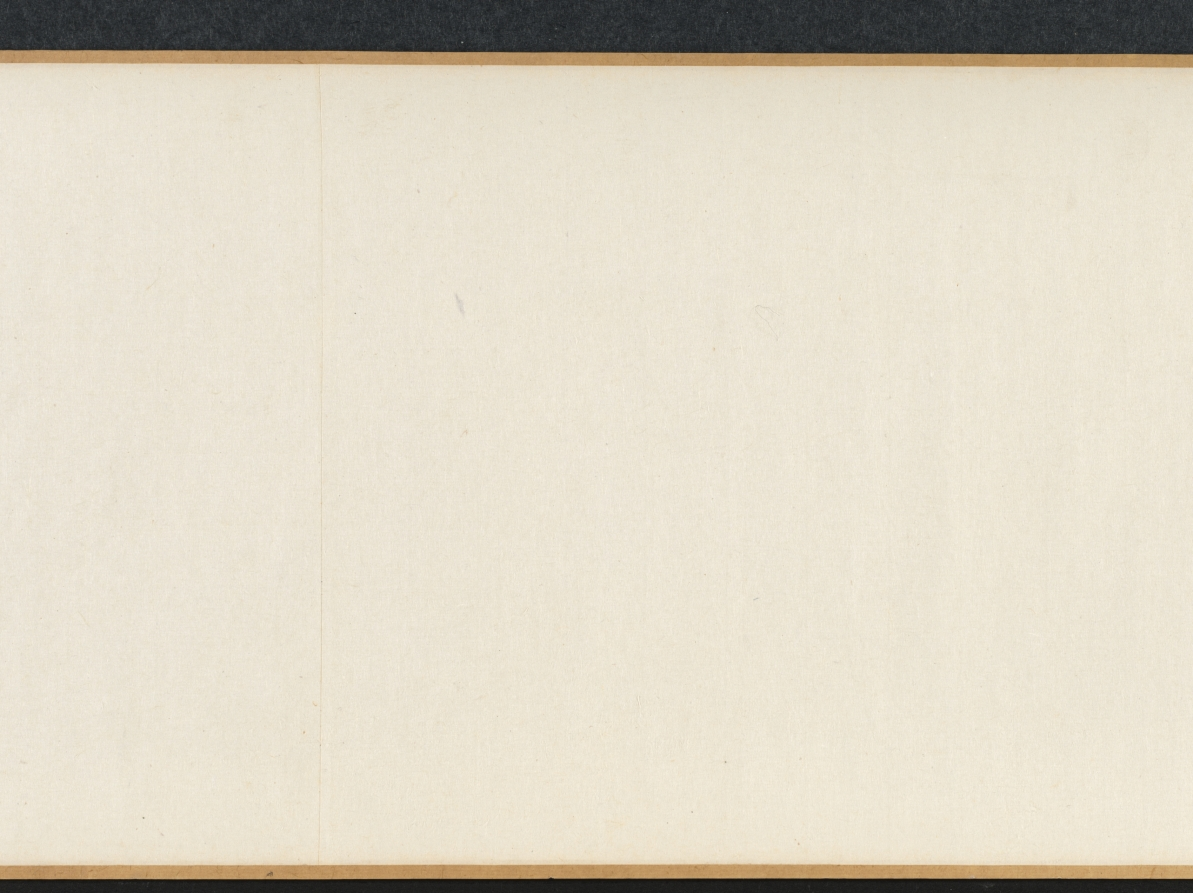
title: Zhao Mengfu Writing the Heart (Hridaya) Sutra in Exchange for Tea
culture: China, Ming dynasty (1368–1644)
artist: Qiu Ying (Chinese, 1494–1552)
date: 1542–43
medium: handscroll, ink and light color on paper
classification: Painting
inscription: Inscription accompanying text of "Heart" sutra, by Wen Zhengming 文徵明 (1470-1559): Zhengming 徵明, written in a boat at Kunshan 崑山, on the twenty-first day of the ninth month, in the renyin 壬寅 year, the twenty-first year of the Jiajing era [1542].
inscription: Colophon by Wang Shih-mou: Chou Yü-shün [Feng-lai] of K'un-shan was a scholarly, refined connoisseur of antiquities. He had acquired the poem written by Chao Ch'eng-chih [Chao Meng-fu] about the exchage of tea for Chao's calligraphy of the Prajna sutra. But the sutra itself, also written by Chao Meng-fu, is lost. He therefore asked Ch'iu Shih-fu [Ch'iu Ying] to do a painting and had Wen Cheng-ming, the artist-in-attendance, write the Hridaya Sutra in the "small, regular" style for replacement. Both works are so excellent that even Chao Meng-fu himself would certainly applaud if he should be reborn to see them. I, Shih-mou, had gotten possession of this scroll from the family of Chou Yü-shün, and since it was so wonderfully matched with one of the treasures in my collection. the Hridaya Sutra written by Chao Meng-fu for Priest Li in "running script," like the reuniting of two halves of a jade pi, I completed the scroll with the several colophons written for the "tea-exchange" poem. I did this because the painting of Ch'iu Ying and the calligraphy of Wen Cheng-ming are definitely masterpieces by themselves with absolutely no need to depend on any of the colophons written for the Chao Meng-fu poem. Furthermore, the two sons of Wen Cheng-ming, Shou-ch'eng [Wen P'eng] and Hsiu-ch'eng [Wen Chia]. have each written a colophon explaining the reason for replacing the calligraphy. As their writings are both acceptable for high standard, I didn't want to throw them away. [So by separating these into two scrolls] I was able to get two complete works of art in one clever stroke. I was quite pleased with myself, and hope that those who see this scroll shall not get suspicious because of the missing colophons. Wang Shih-mou wrote in his Jih-sun-chai study, on the first day of the tenth month, in the chia-shen year of the Wan-li era [1584].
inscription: Colophon by Wen P'eng: I-shao [Wang Hsi-chi] wrote in exchange for a flock of geese. Su Tung-po wrote in exchange for meat. Both episodes have become legends of a thousand years. Sung-hsüeh [Chao Meng-fu] "teased" Priest Kung for tea, and the story was immediately immortalized in the poems by all the famous scholars of the times. Indeed, how could one say his humor and elegance are not equal to the ancient worthies? Unfortunately, the poetry has survived but the writing of the sutra is lost. Yü-shün [Chou Feng-lai] therefore asked my father to make up the writing and so here is the complete work of art. Respectfully inscribed by Wen P'eng in the mid-summer of 1543.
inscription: Colophon by Wen Chia: Sung-hsüeh [Chao Meng-fu], in exchanging tea leaves for his writing of the Prajna, had put himself in the company of Yu-chün [Wang Hsi-chih] who exchanged geese for his writing of the Huang-t'ing sutra [the Yellow Chamber, or the Wai-ching ching, a Taoist text attributed to the Yellow Emperor]. However, was this romantic and cultivated gesture really intended for such small things? Actually, he was only proud that the excellence of his calligraphy had made him worthy to be the successor of the Ch'in Dynasty master. Since, very unfortunately, Chao Meng-fu's writing [of the Prajna] was already lost, my father therefore agreed to replace it, and did the calligraphy in the style of the Yellow Chamber. In addition, Yu-shün [Chou Feng-lai] had asked Mr. Ch'iu Shih-fu [Ch'iu Ying] to do a painting of the sutra writing story in the style of Li Lung-mien at the head of the scroll. Now it would seem the entire episode should go down in history for immortality. Respectfully recorded by Wen Chia, on the eighth day of the eighth month, in the year of k'uei-mao [1543]. trans. WKH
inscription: 4 colophons and 23 seals: 1 colophon, dated 1543, and 2 seals of Wen Peng (1498-1573); 1 colophon, dated 1543, and 2 seals of Wen Chia (1501-1583); 1 colophon, dated 1584, and 3 seals of Wang Shih-mou (1536-1588); 2 seals of Chou Feng-lai (16th c.); 3 seals of Sung Lo (1634-1713); 5 seals of the Ch'ien-lung emperor (r. 1736-95); 1 colophon, dated 1902, and 1 seal of Fei Nien-tz'u (1885-1905); 4 seals of Wan-go H. C. Weng (b. 1918); 1 seal unidentified.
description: The Yuan dynasty calligrapher Zhao Mengfu (1254–1322) is said to have transcribed the Heart Sutra for a certain priest named Li in exchange for tea. Later, during the Ming dynasty, the professional painter Qiu Ying from Suzhou painted this scene for his patron. Here, Zhao Mengfu holds a brush and has a piece of paper laid out before him. On the table is an ink stone, an ink stick, and a small water dropper. Drops of water would dissolve the ink stick into liquid ink when it was ground on the flat square stone.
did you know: Qiu Ying was born to a peasant family, but his natural talent led him to a successful career as a professional painter with wealthy patrons.